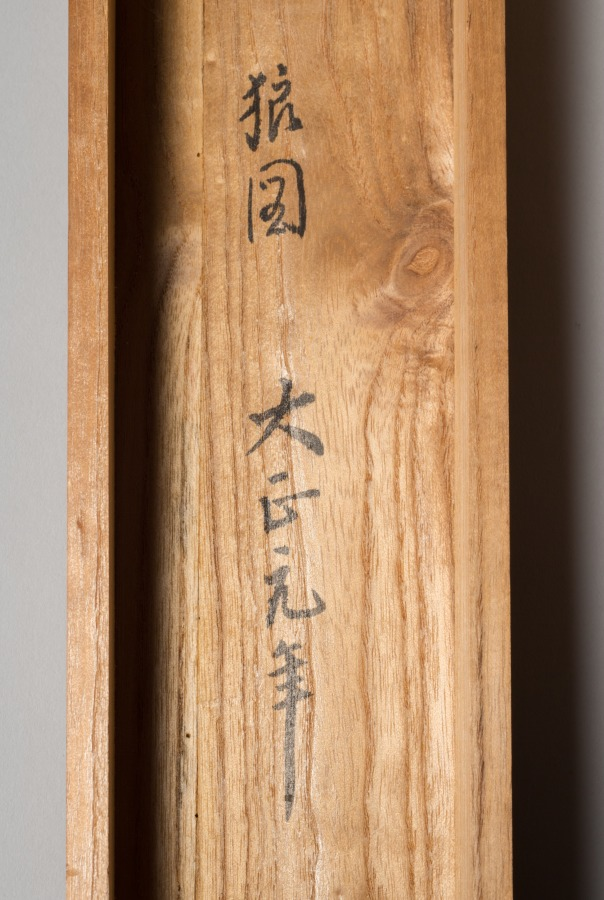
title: Howling Wolf in a Deep Mountain Valley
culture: Japan, Taishō period (1912–26)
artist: Yoshimura Hōryū (Japanese, 1874–1950)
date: 1912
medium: Hanging scroll; ink and color on silk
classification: Painting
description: A wolf howls beneath the tall pines in a misty landscape. The painter was born in the bustling city of Osaka in the Kansai region. He studied with Mori Jihō (1818–1891) and admired the Maruyama school of painters. He was especially gifted at depicting deer, monkeys, tigers, weasels, and other animals.